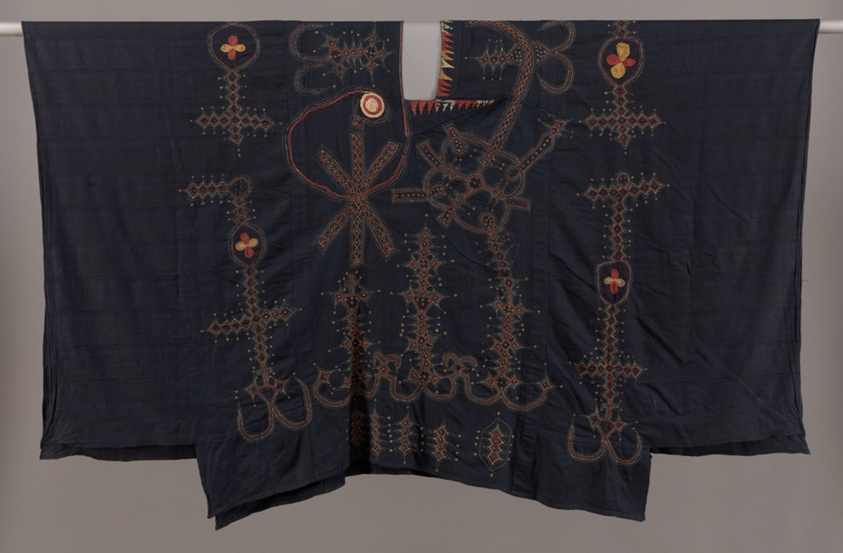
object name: Textile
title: Robe (Boubou Lomasa)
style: soninke, Arts of Africa, african, Islamic, african Art, Northern Africa and the Sahel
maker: Soninke; Possibly Senegal or Mali; Northern Africa and the Sahel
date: Late 19th century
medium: Handspun cotton, indigo dye; polychrome silk and cotton; strip weave, hand embroidery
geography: Senegal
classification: garment; arts of Africa; textile; regalia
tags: robes, islamic, authority, status, garment